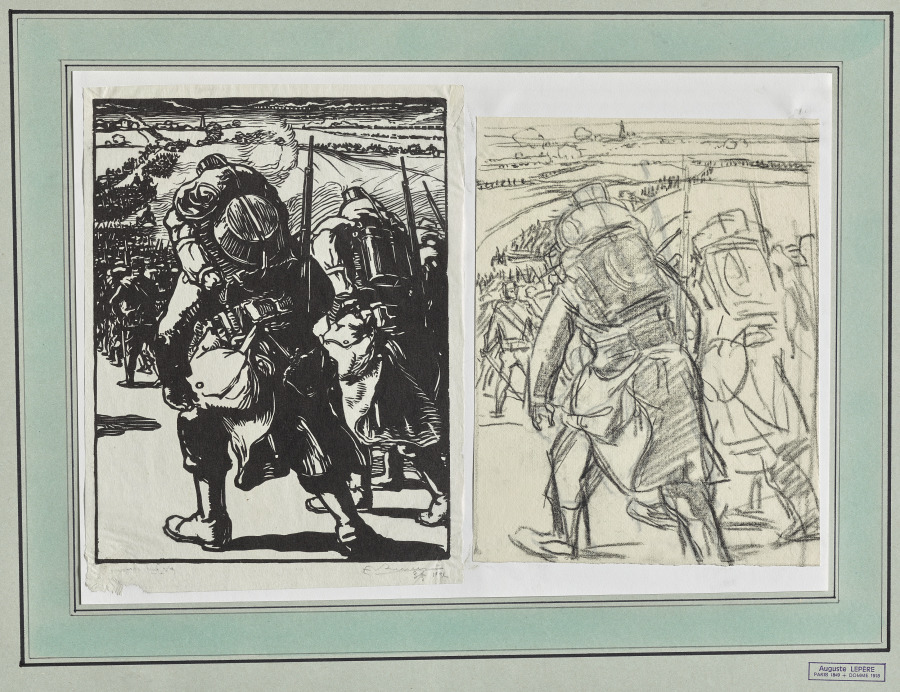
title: Troupe en marche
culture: France, 20th century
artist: Auguste Louis Lepère (French, 1849–1918)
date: 1914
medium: black crayon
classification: Drawing